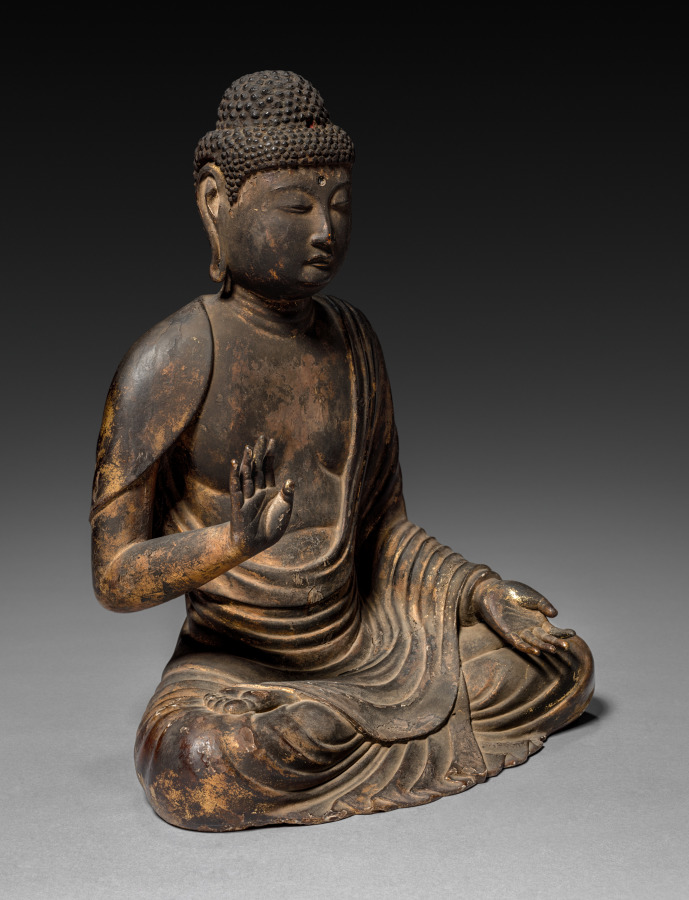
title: Shakyamuni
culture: Japan, Meiji period (1868–1912)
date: c. 1868–1912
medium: Wood with traces of lacquer and gilding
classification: Sculpture